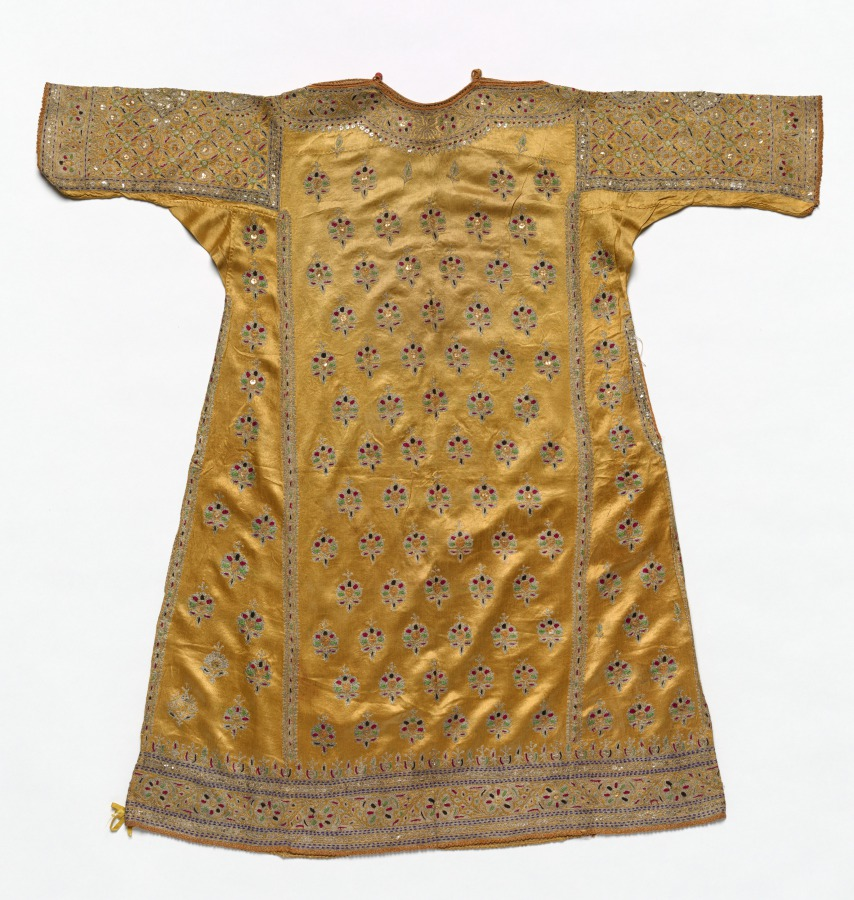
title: Woman's Blouse (Pairan)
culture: Western India, Gujarat, Kachchh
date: 1800s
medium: Silk thread on silk ground, embroidery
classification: Garment